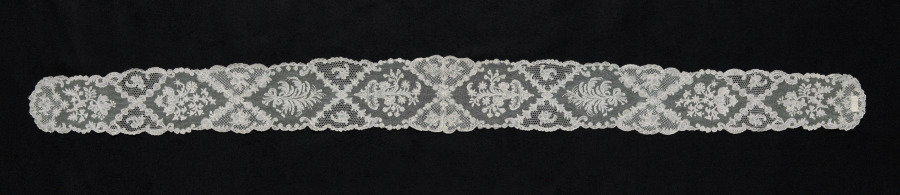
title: Lace Lappet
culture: Belgium, Brussels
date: 1700s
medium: Linen: bobbin lace (Point d'Angleterre)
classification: Lace